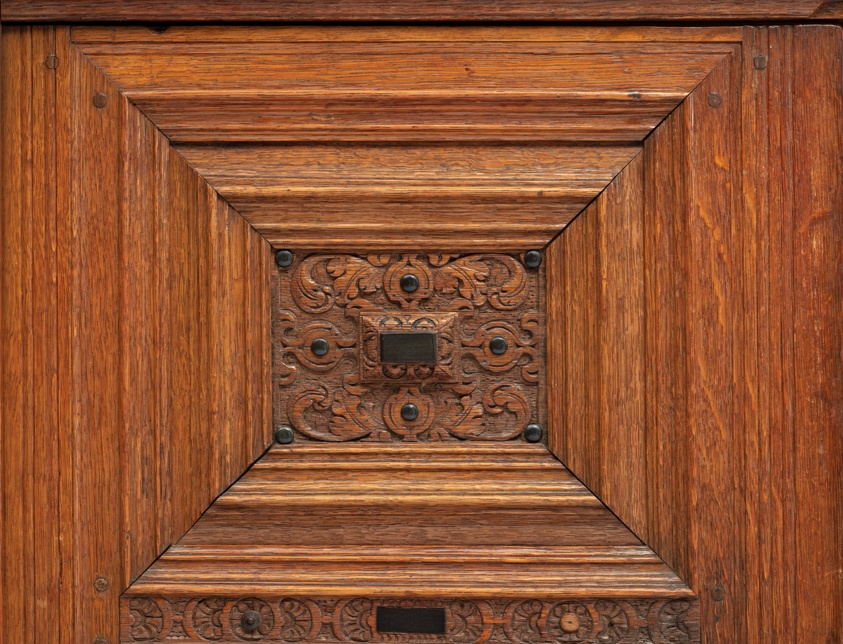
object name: Furniture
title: Linen Cupboard (Kast)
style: Baroque, Mannerism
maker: The Netherlands, probably Amsterdam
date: 1630/50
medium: Oak, pearwood, hardwood, paint, iron, and brass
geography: Netherlands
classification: furniture; decorative arts; functional object; furnishings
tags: lions, animals, architecture